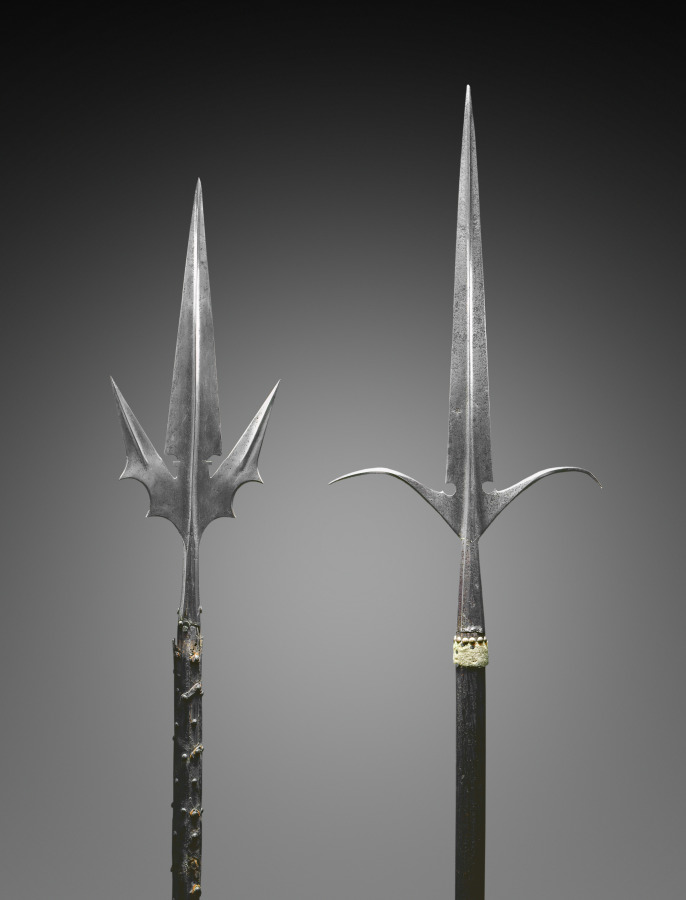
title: Corsèque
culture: Italy, Venice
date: c. 1520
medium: steel; round wood haft; tassel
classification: Arms and Armor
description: The corsèque is a pole arm with a symmetrical three-pronged head consisting of a central double-edged blade and two sharp, upturned wings. The side blades served several functions: as guard to protect the soldier's hand when a thrust was delivered with the central blade; as a hook for unseating a mounted opponent; and to trip the opponent's horse. The corsèque was used mostly in Italy and France from the 1400s to the early 1600s. The version here is sometimes called a chauve-souris after the French word for "bat," since the side blades are thought to resemble a bat's wings.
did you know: The corsèque is said to have originated in Corsica, from where it takes its name.